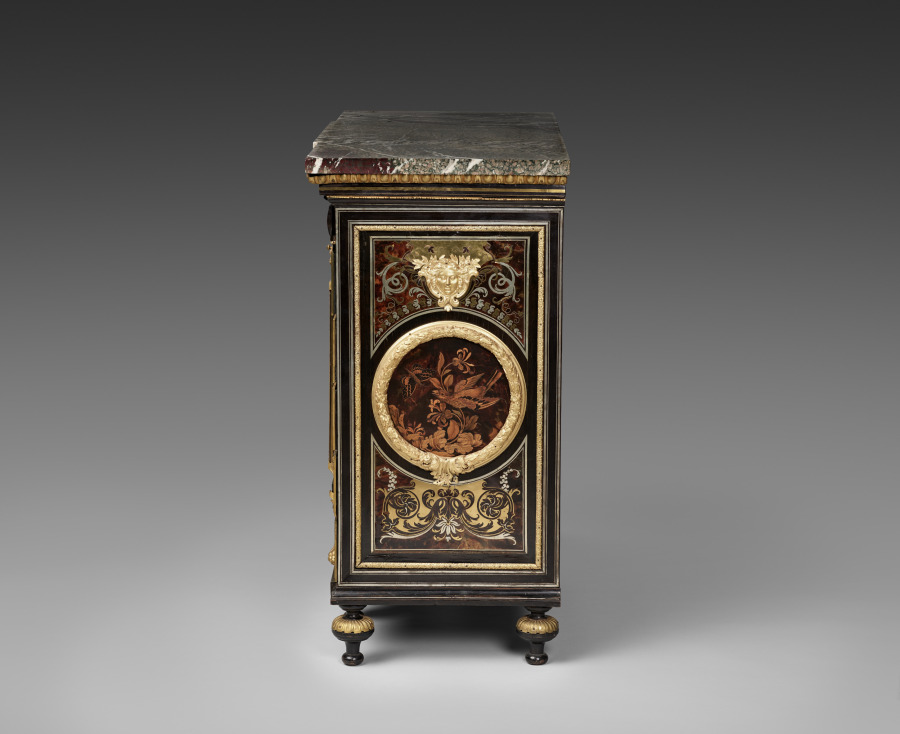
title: Cabinet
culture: France, late 17th Century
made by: André-Charles Boulle (French, 1642–1732)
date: c. 1690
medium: ebony, marquetry in metal and tortoise shell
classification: Furniture and woodwork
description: Appointed cabinetmaker to King Louis XIV in 1672, André-Charles Boulle became a master of furniture making in France during the late 1600s until his death in 1732. Known primarily for his use of marquetry, in which metal patterns are inlaid into tortoiseshell then applied within the veneered surface of the furniture, Boulle established a level of quality and craftsmanship few others could achieve. As a result, his work found favor at the royal court and among other aristocrats and diplomats eager to impress the king. The inclusion of a medallion depicting Louis XIV within the bronze decoration of this chest would have identified the owner with the royal court. Often exhibiting stout architectural proportions with elegant groups of inlaid motifs such as the parrot on the central panel of this chest, Boulle’s designs are an example of the intellectual fashion for contrasting ideas, materials, and motifs.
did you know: Originally designed to sit atop an elaborate tall stand, this chest was likely altered in the late 1700s to reduce its scale and height.